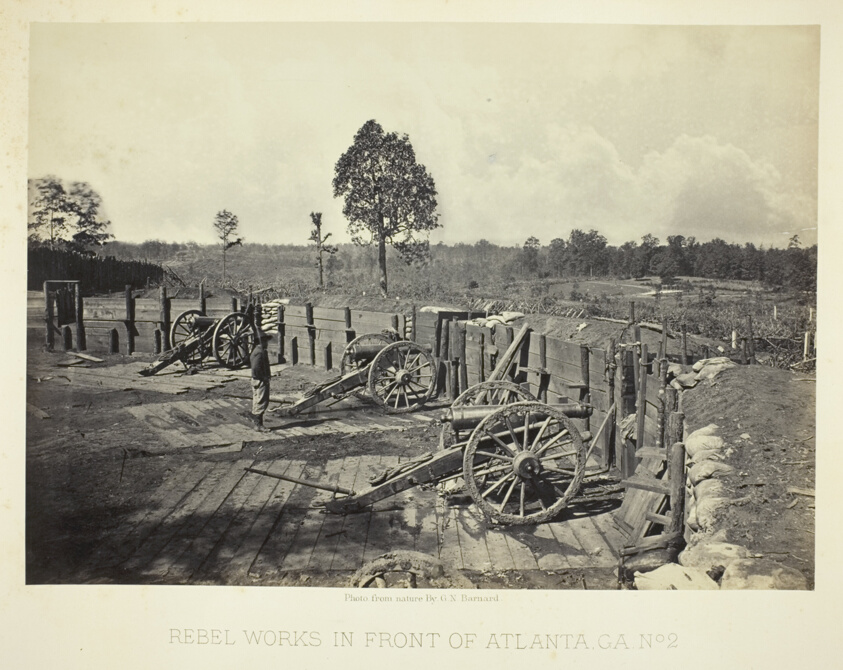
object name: Photograph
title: Rebel Works in Front of Atlanta, GA, No. 2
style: 19th century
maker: George N. Barnard (American, 1819–1902)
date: 1864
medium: Albumen print, plate 40 from the album "Photographic Views of the Sherman Campaign" (1866)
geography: United States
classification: albumen silver print; photographic process; photography; photograph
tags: Collected by Hugh Edwards, Sherman's Campaign 1866